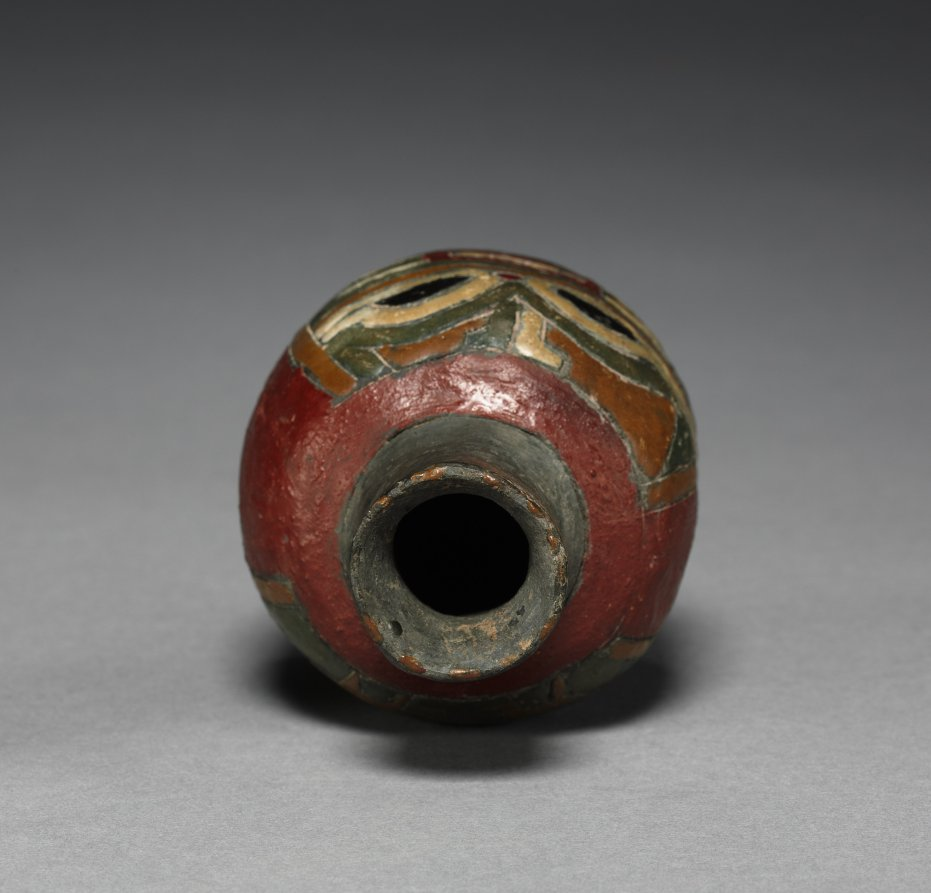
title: Small Bottle with Feline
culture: Peru, South Coast, Paracas (Cavernas) style (700 BCE–1 CE)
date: 700–1 BCE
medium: earthenware, resin-based paint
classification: Ceramic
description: Little is known of the meaning of the beautifully abstracted felines so often incised on Paracas ceramics. The designs achieve much of their complexity through color applied as resin-based paint after the vessel was fired in a smoky atmosphere that blackened its surface.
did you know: Small, wild, reclusive felines, pampas cats live on the margins of agricultural fields, where they prey on rodents and other pests that are a farmer’s bane.